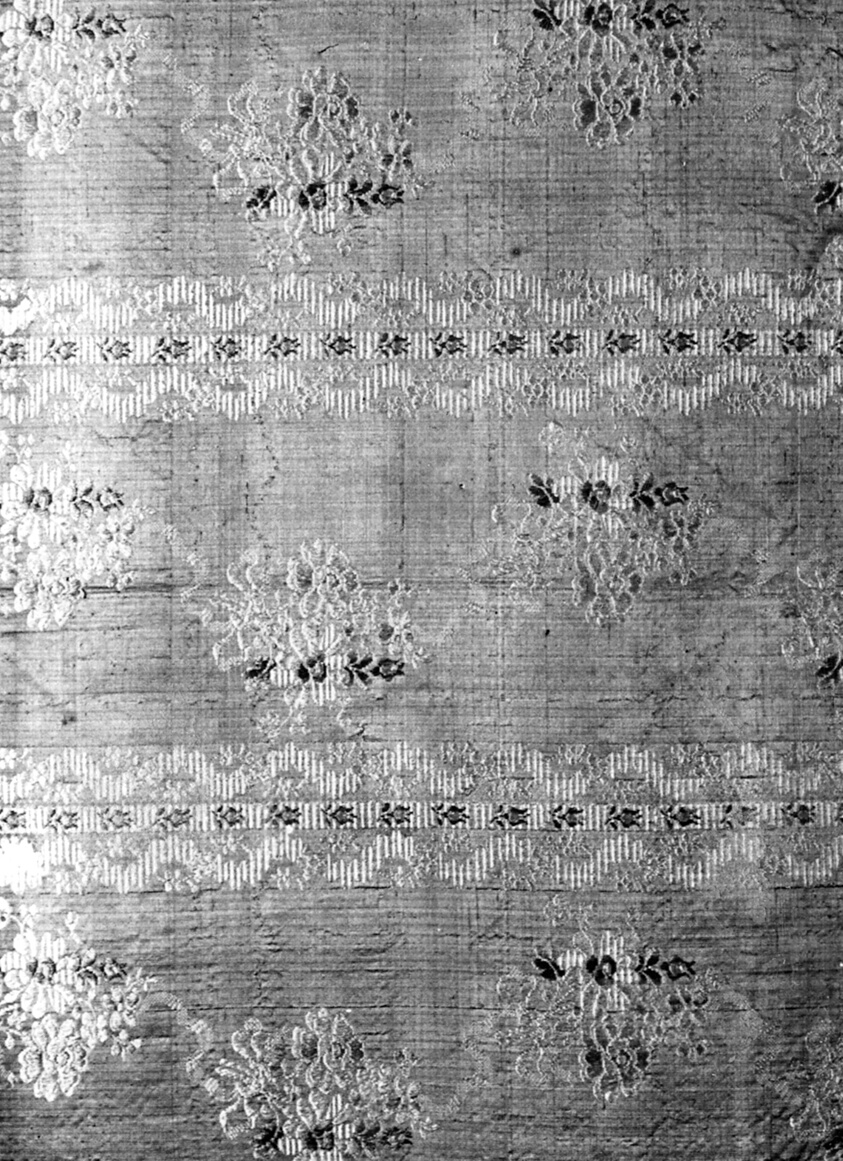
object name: Textile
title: Panel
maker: France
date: Late 18th century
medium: silk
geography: France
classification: textile; weaving